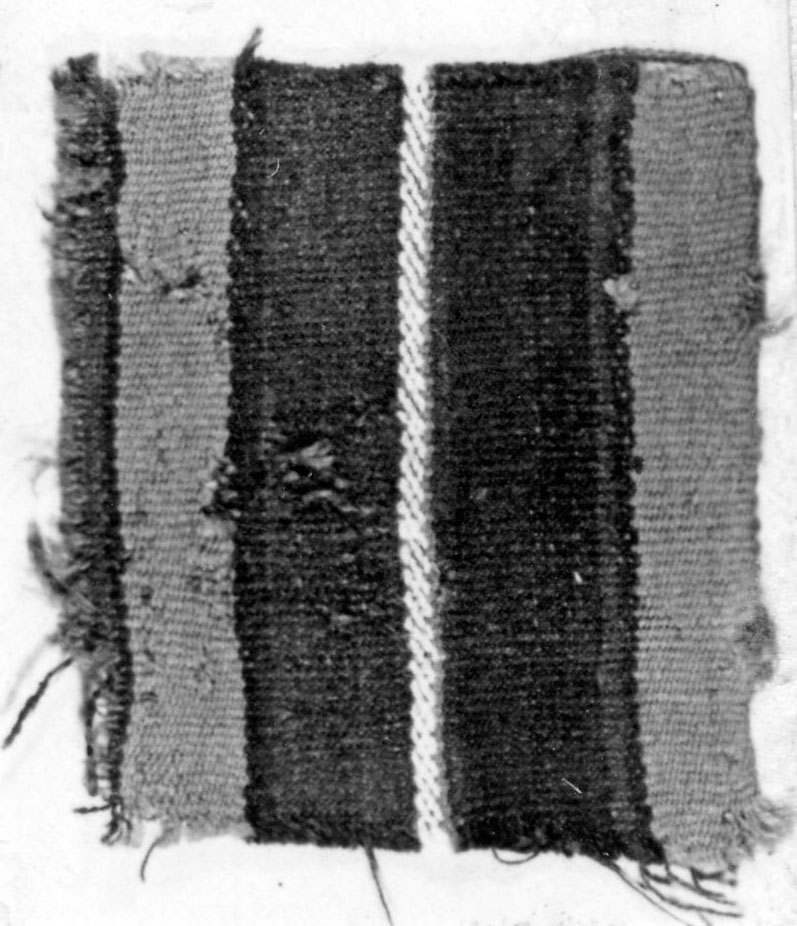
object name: Textile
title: Fragment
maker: Peru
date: A.D. 1/1532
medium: plain simple cloth (old card)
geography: Peru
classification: textile; weaving